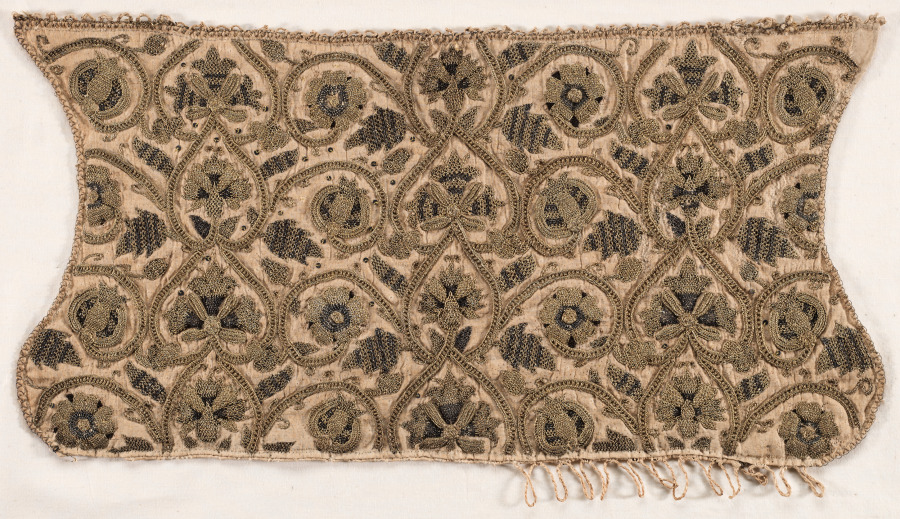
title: Coif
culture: England, Elizabethan Period, late 16th century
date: late 1500s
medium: Silk, gold and silver thread, sequins, padding, linen; embroidery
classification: Embroidery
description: According to Elizabethan embroidery scholar Jacqui Carey, construction of this woman’s coif is typical of the period, as is its design. The coif is a single piece of embroidered plain weave linen, cut in the usual way. The embroidery features pomegranate, honeysuckle, rose, carnation and acorn motifs set within stylized undulating stems and foliage. Most of the embroidery is worked with two distinct types of metal thread (thin metal strips wrapped around a silk core)—gilt thread and silver thread which has tarnished to black. Black silk thread also is used for the embroidery. Nine different stitches are used on the coif, including Elizabethan blanket stitch (variation three), Elizabethan ladder with filling, chain stitch, Elizabethan double Vandyke/twisted chain, Elizabethan plaited braid stitch (standard version), Elizabethan Ceylon stitch, Elizabethan trellis stitch, corded double detached buttonhole, and Elizabethan spider’s web. Many of the motifs are padded underneath the embroidery, likely with wool.